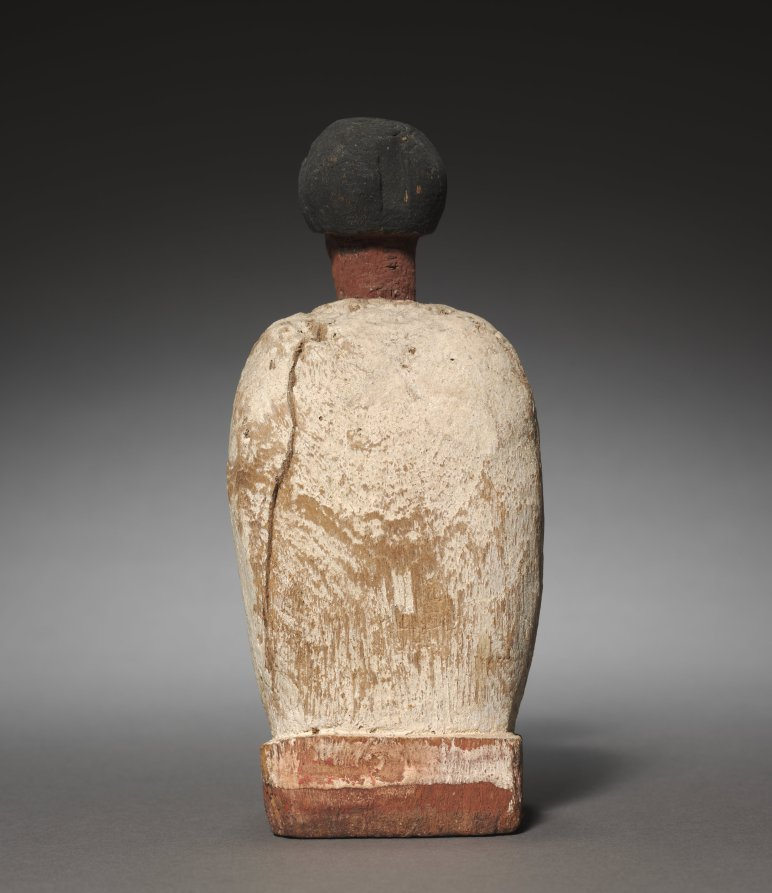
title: Model Boat Owner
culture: Egypt, Middle Kingdom (2040–1648 BCE), Dynasties 11–12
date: 2040–1648 BCE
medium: painted wood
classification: Funerary Equipment